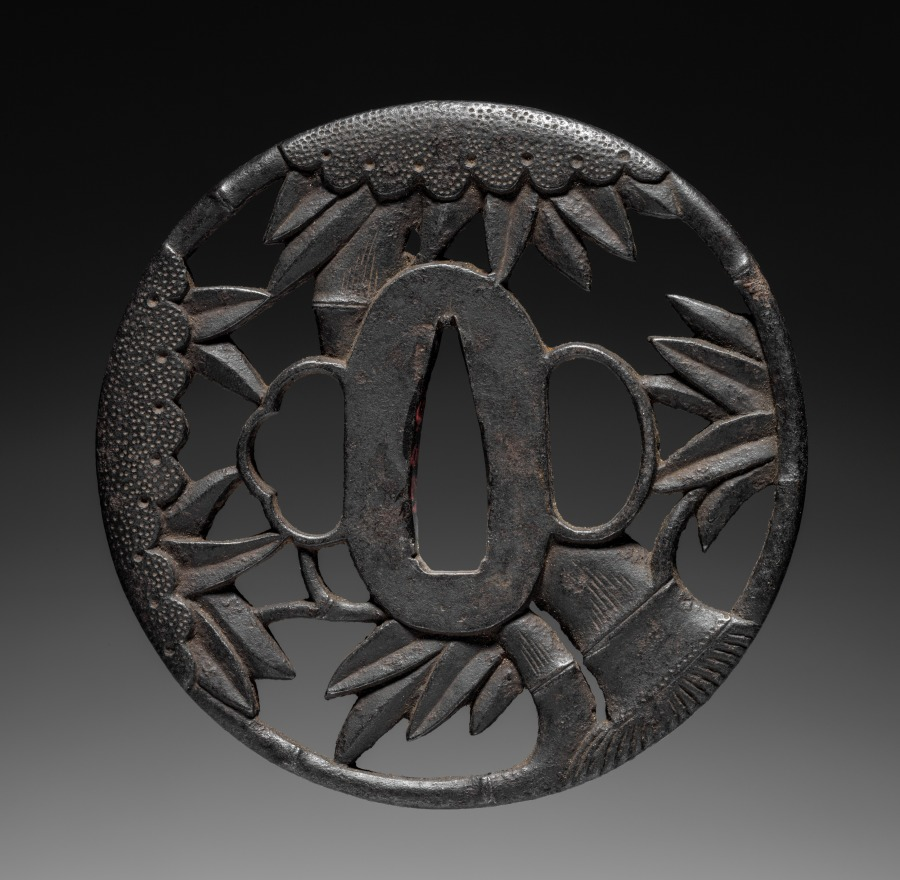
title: Sword Guard Tsuba) with Bamboo and Cloud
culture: Japan, possibly Edo period (1615-1868)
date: c. 1615–1868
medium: iron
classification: Arms and Armor